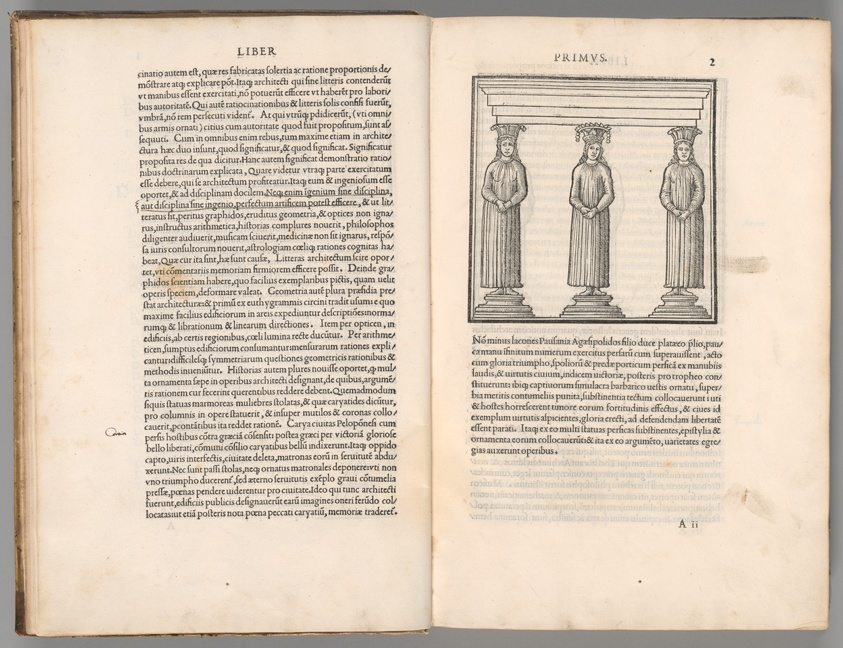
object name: Book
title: De Architectura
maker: Marcus Vitruvius Pollio (Roman, active first century BCE)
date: Venice, Italy: Ioannis de Tridino, also known as Tacuino, 1511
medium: Letterpress and woodcut in black on ivory laid paper; four-piece decorative woodcut title border with scrolling foliage and dolphin motifs; full alum-tawed ornamental leather binding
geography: Italy